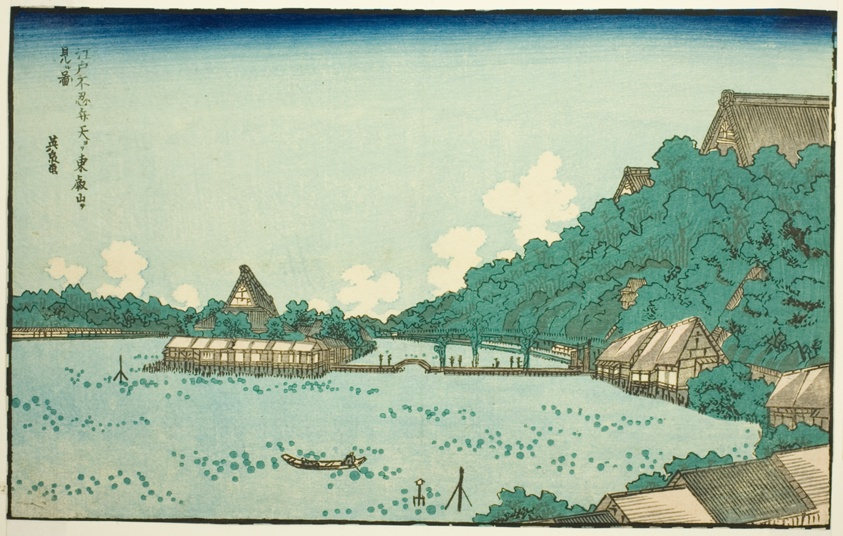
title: Toeizan Temple Seen from Shinobazu Benten Shrine in Edo (Edo Shinobazu Benten yori Toeizan o miru zu), from a series of famous places in Edo with frames of Western letters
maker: Keisai Eisen (Japanese, 1790-1848)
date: c.1830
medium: Color woodblock print; nishiki-e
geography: Japan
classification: woodblock print; print; asian art